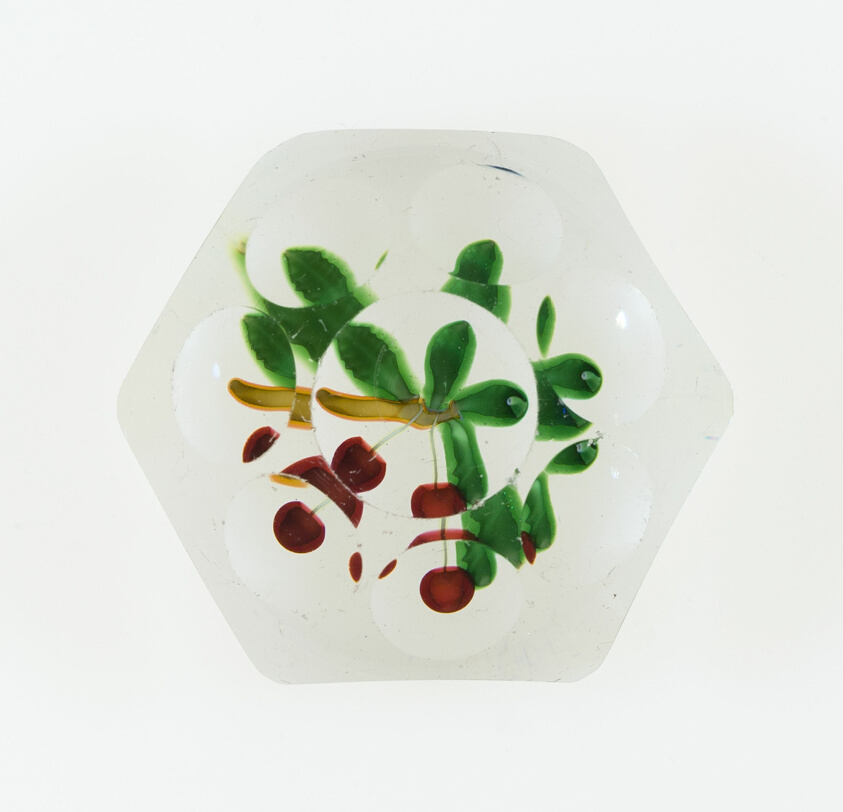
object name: Glass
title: Paperweight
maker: Saint-Louis Glassworks (Cristalleries de Saint-Louis); Lorraine, France, founded 1586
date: c. 1845–60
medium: Glass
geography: Saint-Louis-lès-Bitche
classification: paperweight; glass